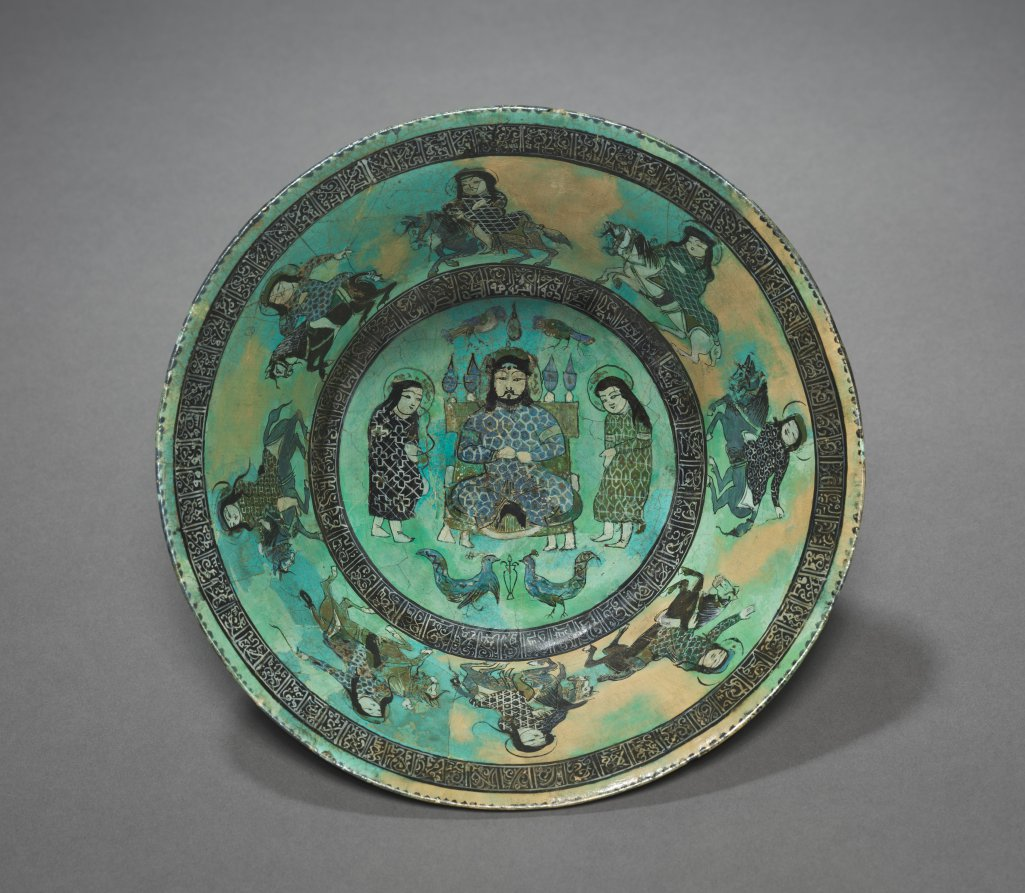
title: Bowl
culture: Iran, Seljuq period (1037–1194)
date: late 1100s–early 1200s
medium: fritware with overglaze-painted design (minai ware)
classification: Ceramic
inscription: Two bands of Kufic inscriptions on the interior of the bowl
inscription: Naskhi inscription on the exterior of the bowl